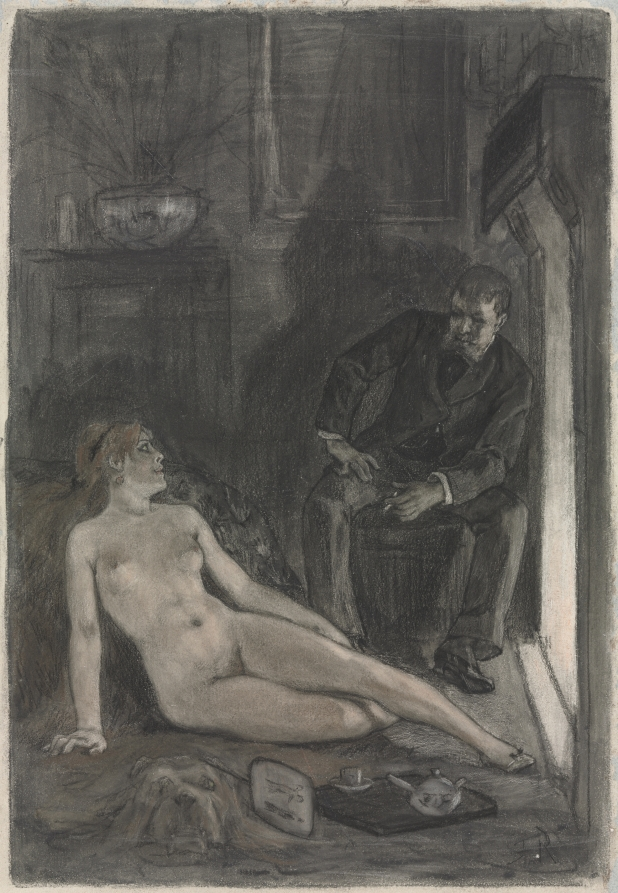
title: Winter Evening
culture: Belgium, 19th century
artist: Félicien Rops (Belgian, 1833–1898)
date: last third 19th century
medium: black crayon, black chalk and graphite (stumped and scraped away in places) and brush and gray wash and crayon, heightened with white chalk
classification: Drawing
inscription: signed, lower right, in black chalk: [artist monogram: FR] ; VERSO OF SECONDARY SUPPORT, upper center, in graphite: No [underlined] X ; upper center, in graphite: 1.carte [illegible] / teinte ancienne / Genre III mais plus etroite / [illegible] ; center, in graphite: 31 + 24. / 891. ; lower left, in graphite: F Rops / - / "Soirée d'Hiver" [underlined] / Collection Holtzer / N° [o underlined] Y de la Vente de 12 et 13 Nov 1896. / (dessin ombré H. 0.22. L. 0.15) / - / Dessin reproduit (d'après une photo) / á la page 143 du volume / de lemonnier "Felicien Rops" / Floury 1908. / sous la designation "Femme couchée" ; lower right, in graphite: 64